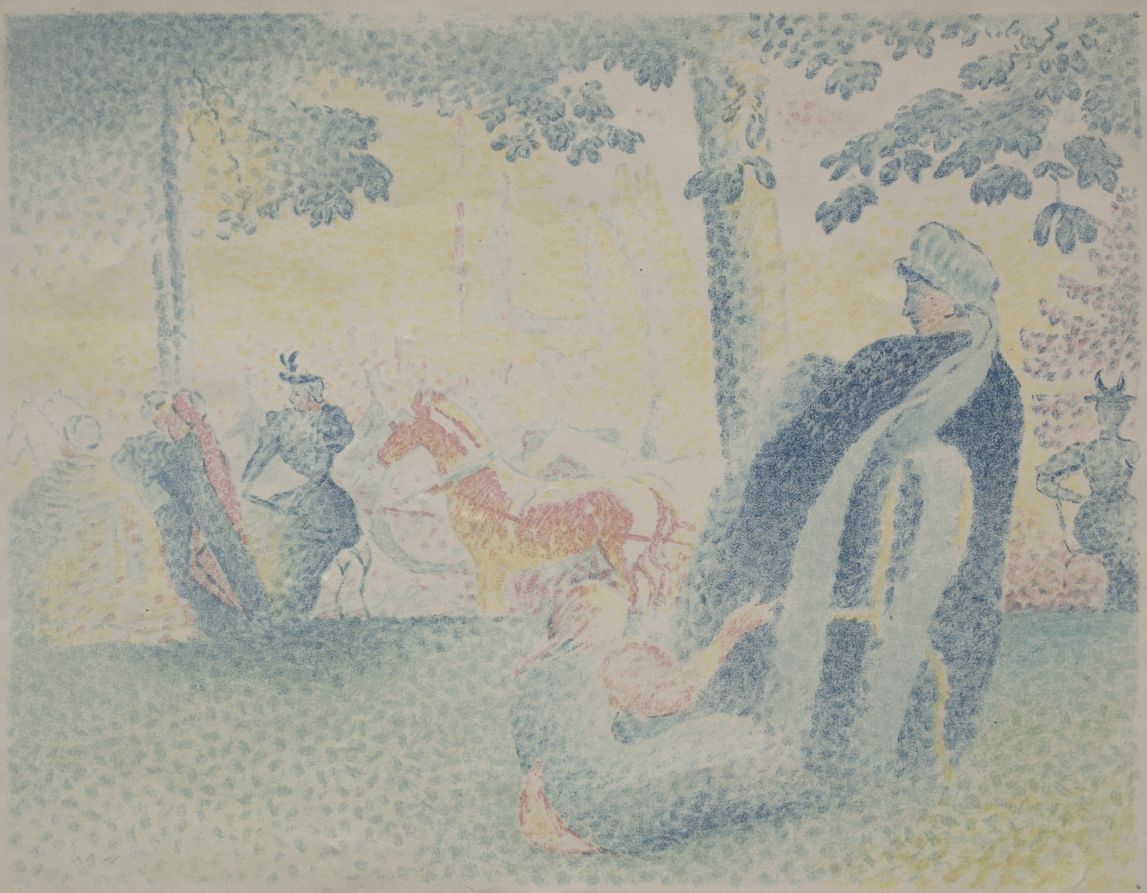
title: In the Park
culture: France, 19th century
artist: Henri-Edmond Cross (French, 1856–1910)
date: c. 1890s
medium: color lithograph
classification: Print